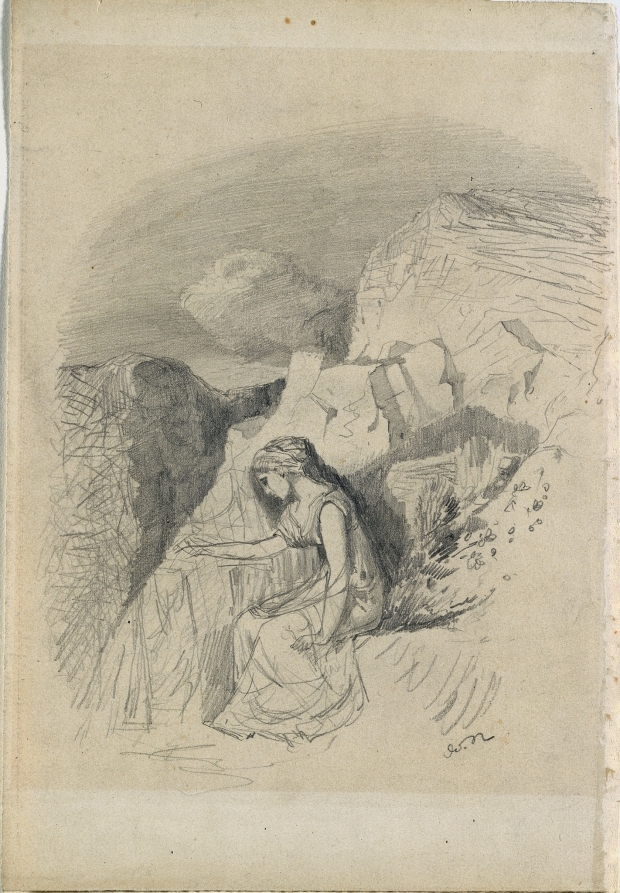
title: Melancholy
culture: France, 19th century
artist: Odilon Redon (French, 1840–1916)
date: c. 1868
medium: graphite on beige wove paper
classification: Drawing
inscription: signed, lower right, in graphite: Od.R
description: Odilon Redon grew up near the massive Pyrénées mountains in southern France and their image recurred throughout his work. In a series of drawings made during the 1870s, Redon used the craggy surface and infinite reach of his native landscape to evoke a sense of solitude and isolation. The woman seen here, for example, leans forward and casts her eyes downward as if in resignation.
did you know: Redon incorporated fantastical details into his mountainous landscape, including a small creature seen faintly directly above the woman and a profile that vaguely appears in the shadows next to her.